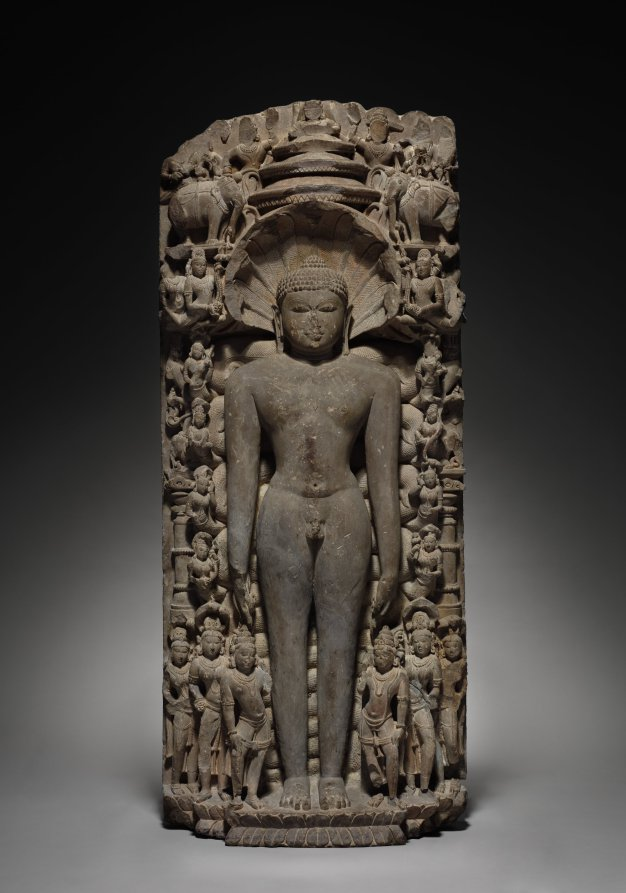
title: Parshva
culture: Central India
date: 800s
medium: sandstone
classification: Sculpture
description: Parshva is the 23rd of the 24 Jinas who achieved liberation. He is the only one who is depicted with a serpent. This sculpture was made for followers of the branch of Jainism called Digambara, who enforce the regulations of total nudity among those actively seeking liberation. The only adornment of his figure is the auspicious symbol on his chest and the wheels of righteousness on his palms. The stark form of thenude body standing in a posture of meditation is masterfully set off from the array of gods and serpent divinities who venerate him. He stands with his feet on a lotus pedestal, but his hierarchically tall form reaches to the heavens, where gods fly to honor him with flower garlands. Three umbrellas over his head indicate his status as a liberated being worthy of worship.